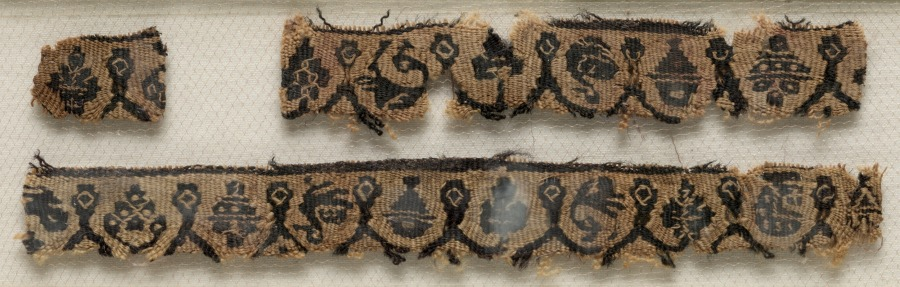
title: Fragments, Sleeve Ornament from a Tunic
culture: Egypt, Byzantine period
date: 500s - early 600s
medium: tapestry (probably originally inwoven in tabby ground); wool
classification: Textile